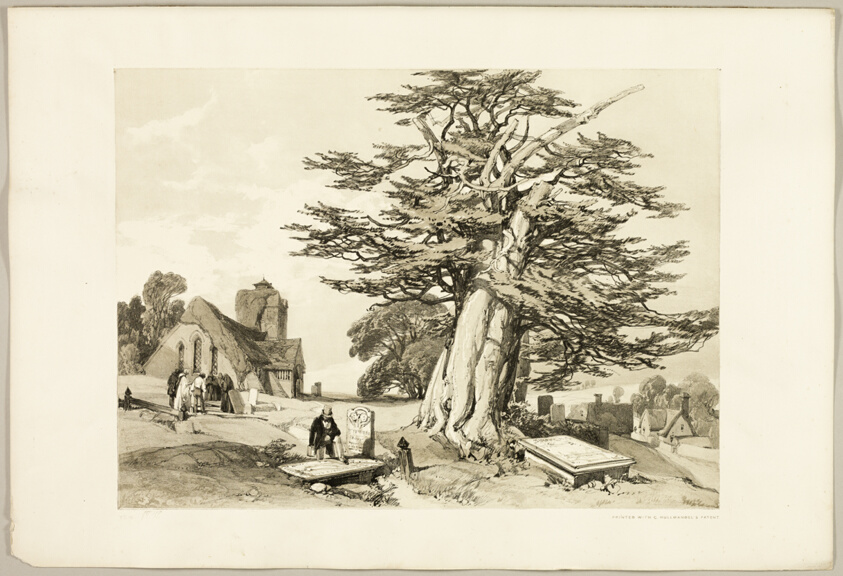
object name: Print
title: Yew, from The Park and the Forest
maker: James Duffield Harding (English, 1798-1863); printed by Charles Joseph Hullmandel (English, 1789–1850); published by Thomas McLean (English, 1788–1875)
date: 1841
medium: Lithograph in black, with gray tint from a second plate, on ivory wove paper, laid down on ivory wove paper (chine collé)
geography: England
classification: lithograph; print; prints and drawing